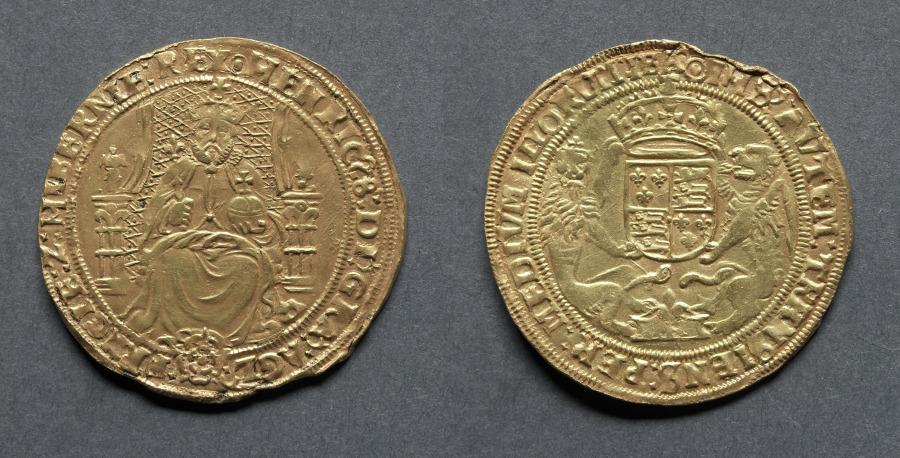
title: Half Sovereign: Henry VIII (obverse); Crowned Arms (reverse)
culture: England, Henry VIII, 1509-1547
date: 1544–47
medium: gold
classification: Coins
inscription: HENRIC. 8. DI. GRA. AGL FRNCIE Z. HIBERNIE REX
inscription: IHC. AVTEM PER MEDIVM ILLO RVM IBAT.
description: In this third coinage, a new portrait of the king appears. There is now an attempt to make the portrait lifelike, and we see the king fat and middle-aged compared to previous coinage such as 1969.170.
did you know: The half sovereign was first introduced in 1544 under Henry VIII and was valued at half a pound sterling or ten shillings.